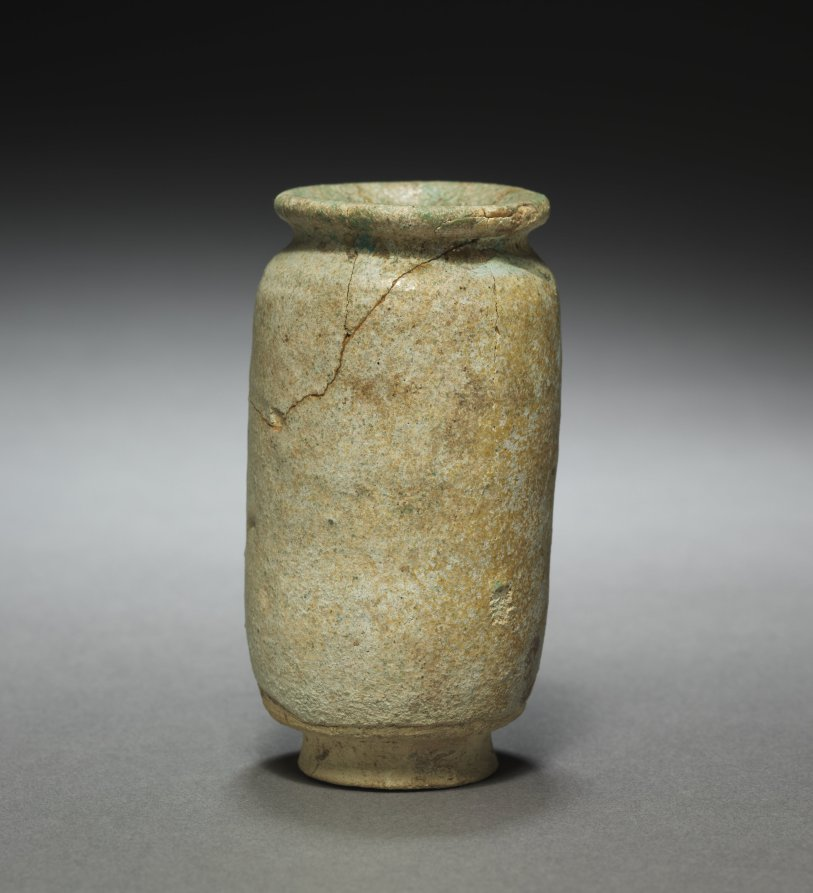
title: Bottle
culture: Parthian Empire (247 BCE–224 CE)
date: 1–200 CE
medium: earthenware with weathered glaze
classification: Ceramic